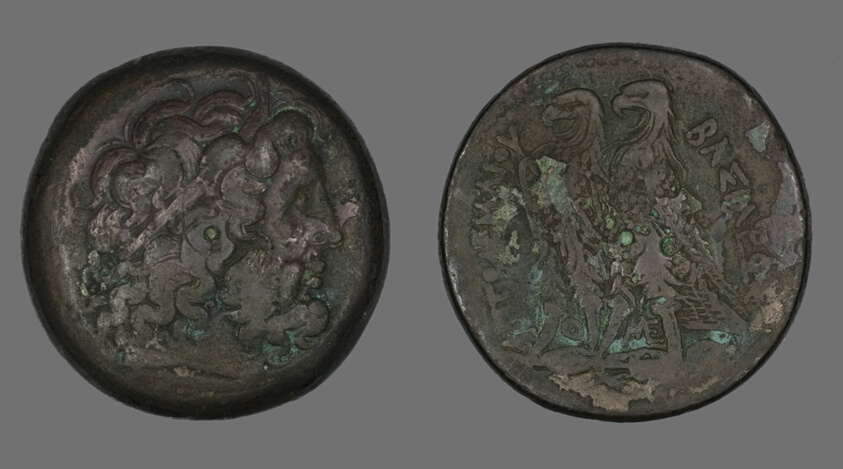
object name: Coin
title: Coin Depicting the God Zeus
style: ptolemaic, greco-roman (egyptian)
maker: Greek, minted in Egypt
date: 261-247 BCE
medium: Bronze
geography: Egypt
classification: coin; ancient art; struck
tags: mythological figures, eagles